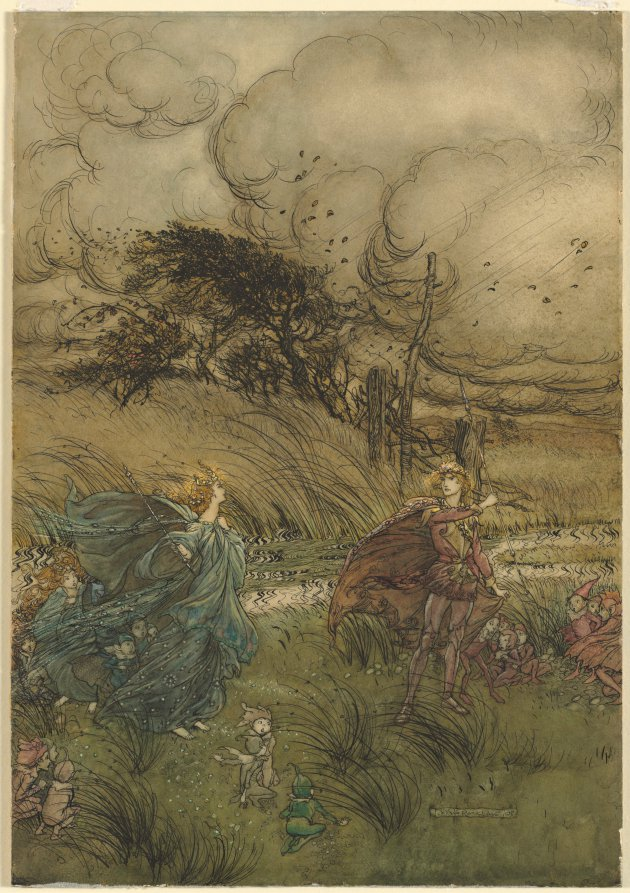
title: And Now They Never Meet in Grove or Green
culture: England, 20th century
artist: Arthur Rackham (British, 1867–1939)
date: 1908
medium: pen and black ink and watercolor with scraping and minute touches of white gouache on artist's illustration board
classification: Drawing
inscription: signed and dated, in pen and black ink, at lower right: Arthur Rackham 08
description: This drawing is one of 40 made by Arthur Rackham to illustrate William Shakespeare's comedy A Midsummer Night's Dream. It depicts the confrontation between Oberon and Titania, king and queen of the fairies, that takes place in the woods outside of Athens in act 2, scene 1. The artist painted a stormy sky looming over the magical couple to echo the story's mood. Rackham worked during a golden age of book illustration in England, around the turn of the 20th century, and the images he produced for literary works influenced future productions of Shakespeare's work.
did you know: Arthur Rackham was one of the first book illustrators to take advantage of color halftone printing, augmenting his ink drawings with subtle washes of transparent hues.